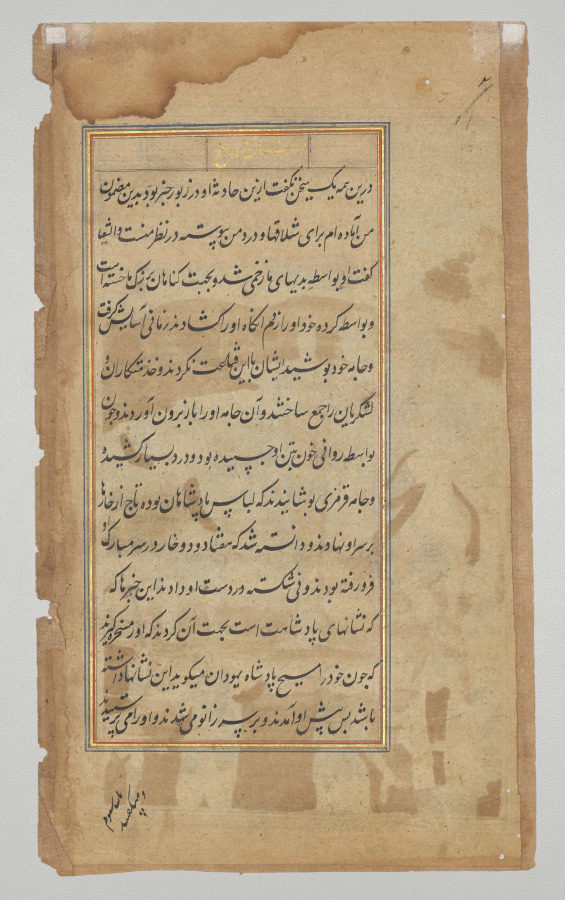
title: The Flagellation (folio 182 recto), from a Mirror of Holiness (Mir’at al-quds) of Father Jerome Xavier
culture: Mughal India, Allahabad, made for Prince Salim (1569–1627)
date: 1602–4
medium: Gum tempera, ink, color, and gold on paper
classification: Manuscript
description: Two Romans flog Jesus, who has been bound to a stake at the center of the circular composition made up of soldiers and the hilly horizon. His subtly articulated expression conveys both pain and compassion, as he endures cuts to his flesh and the bindings around his elbows that secure him so tightly to the post that his feet are elevated off the ground. This is the last illustration in the Cleveland manuscript of the Mirror of Holiness. The Crucifixion was never illustrated, possibly because the patron, Prince Salim, was Muslim. According to the Koran, Jesus did not die on the cross, but was absorbed into heaven by Allah.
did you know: A halo encircles Jesus’s head, and his hair and beard are highlighted with gold.